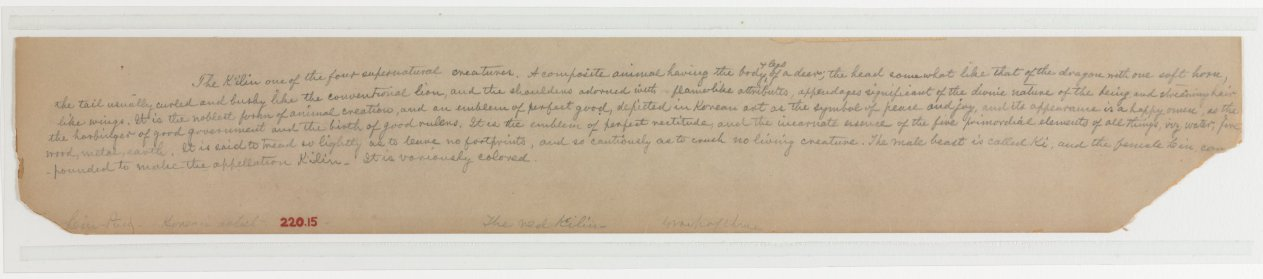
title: Daoist Immortal on a Qilin and Two Attendants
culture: Korea, Joseon dynasty (1392–1910)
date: late 1800s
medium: Ink and color on paper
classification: Painting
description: By the late 18th century, subjects that deal with Daoist immortals and their fantasy stories were increasingly chosen for paintings. For their wish-granting message, Daoist figure paintings such as this one were often commissioned to celebrate festive occasions. Judging from its dimension, this paining used to be part of either a small-size multi-panel folding screen or a large-size album that depicts a series of Daoist immortals and Buddhist deities.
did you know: As a fantastical animal hybrid of a griffin and a sphinx, the animal qilin was used as a symbol of heavenly blessings.